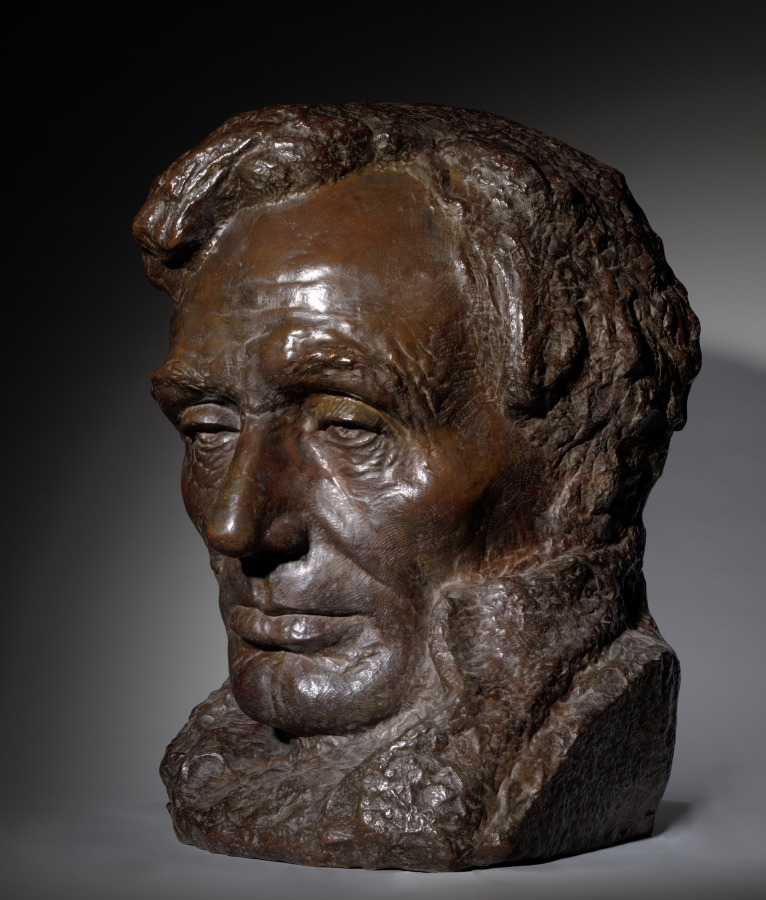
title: Head of Lincoln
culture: America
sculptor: Gutzon Borglum (American, 1867–1941)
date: 1908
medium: bronze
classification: Sculpture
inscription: Signed and dated on left of base: "Gutzon Borglum, 1908"